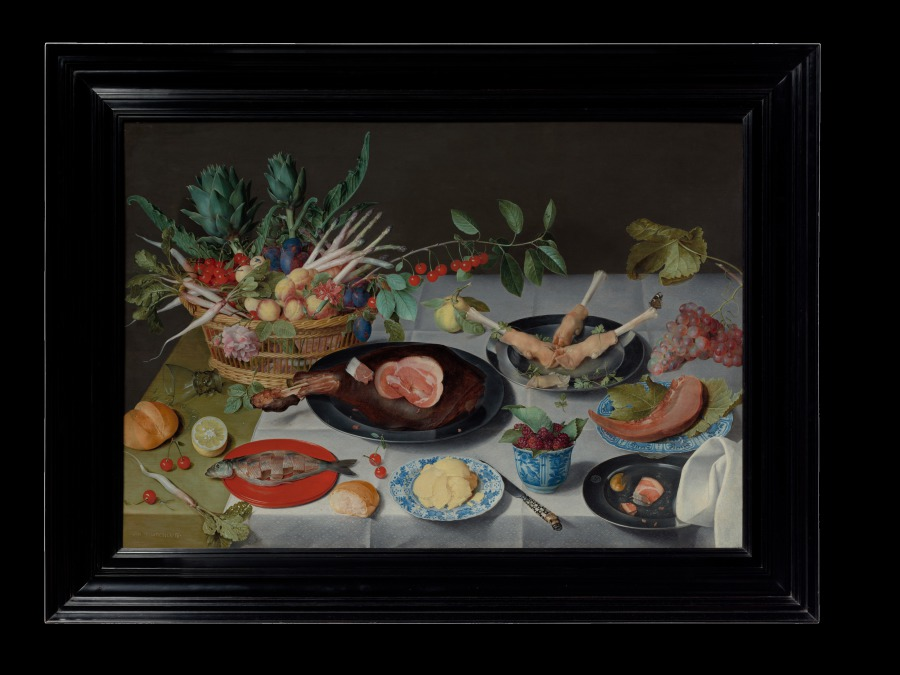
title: Still Life with Meat, Fish, Vegetables, and Fruit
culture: Flanders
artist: Jacob van Hulsdonck (Flemish, 1582–1647)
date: c. 1615–20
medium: Oil on panel, the reverse prepared with gesso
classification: Painting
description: Jacob van Hulsdonck depicted a colorful array of foods, and tablewares ranging from an earthenware trencher to delicate Chinese porcelain—an expensive luxury made possible by international trade. For seventeenth-century viewers, the quantity and variety of foods would have represented a utopian world without scarcity or hunger. Partially eaten food and an overturned glass suggest that diners have just departed, leaving insects to explore the remains.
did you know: Hulsdonck thoughtfully included condiments here: butter, lemon, parsley for the trotters, and a dab of mustard for the ham.